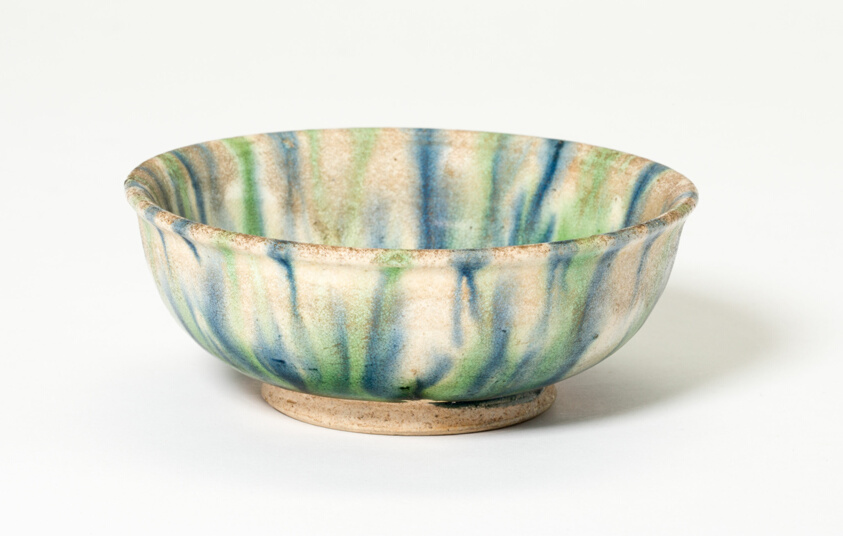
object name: Vessel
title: Bowl with Streak Pattern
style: Chinese (culture or style)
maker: China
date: Tang dynasty (618–906), first half of 8th century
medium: Slip-coated earthenware with cobalt blue and lead green streaks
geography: China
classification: bowl; earthenware; dish (vessel); asian art; ceramics; vessel